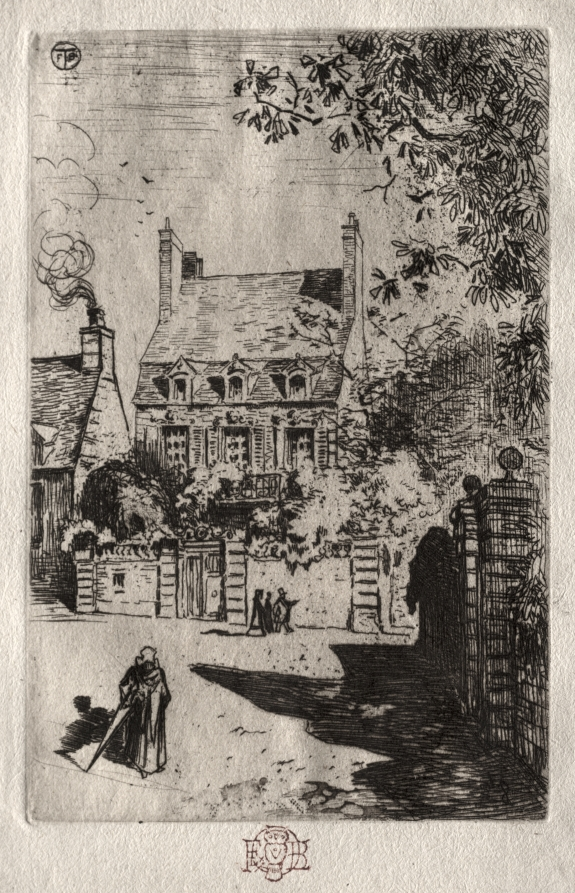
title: In Province: The House at Orléans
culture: France, 19th century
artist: Félix Hilaire Buhot (French, 1847–1898)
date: c. 1875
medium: etching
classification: Print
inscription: upper right corner, in plate: [artist's monogram]